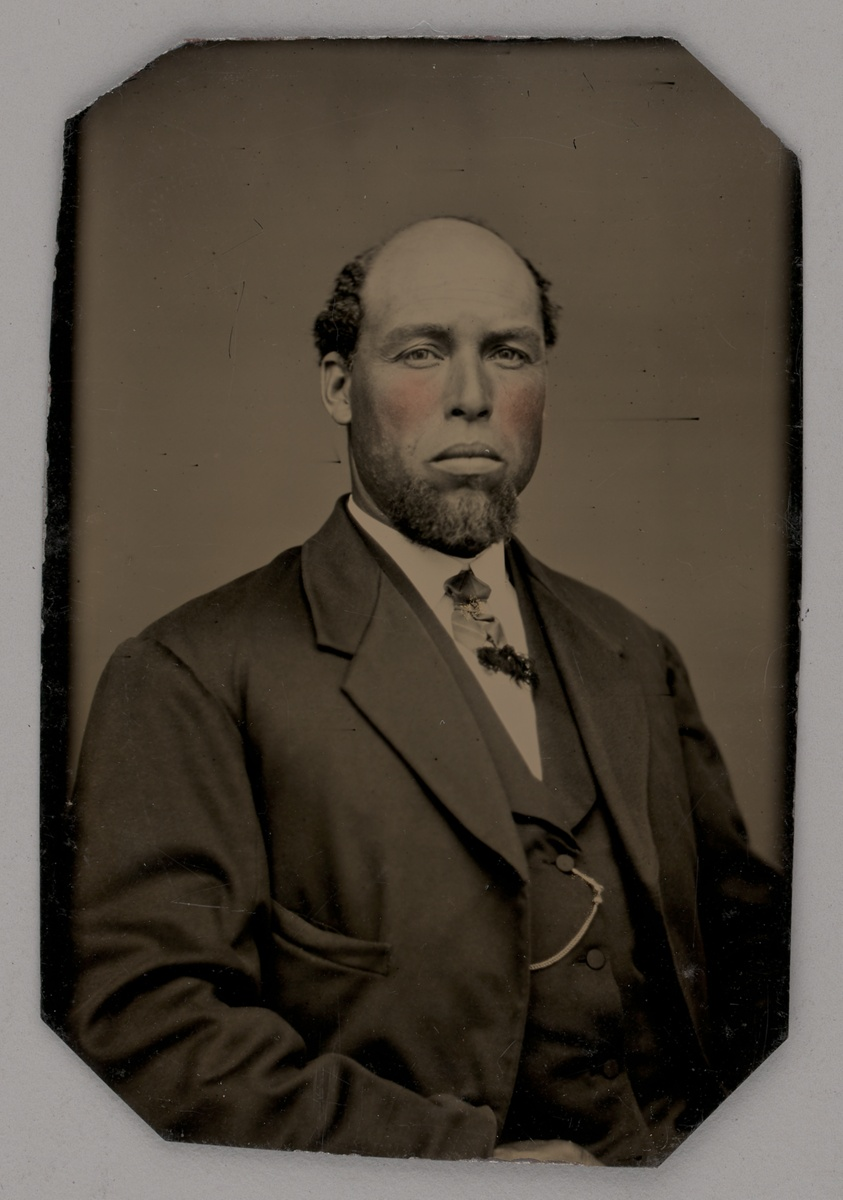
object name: Photograph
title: Untitled (Portrait of a Man)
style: 19th century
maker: Unknown maker; American, 19th century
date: 1880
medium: Tintype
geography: United States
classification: portrait; tintype; photograph; photographic process; photography; portrait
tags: portraits: African American subject, lundberg collection, African American, portraits, portraits: male subject, portrait, men, Male